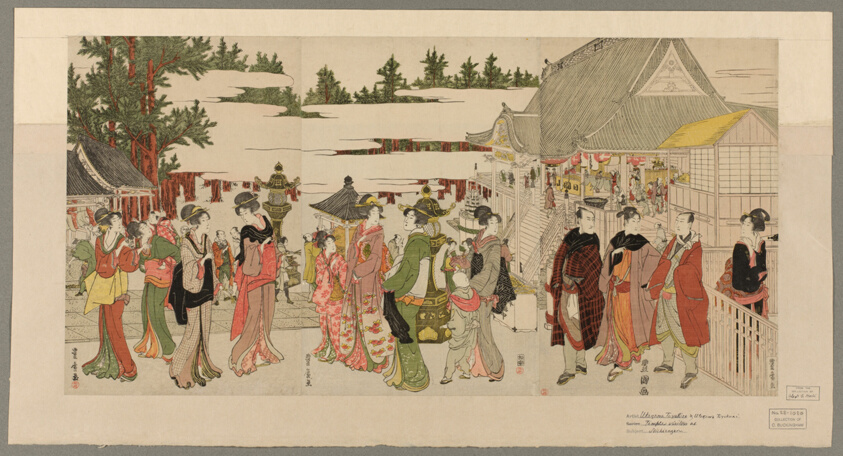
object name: Print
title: New Year's Pilgrimage to Myohoji Temple in Horinouchi (Horinouchi Myohoji eho mairi no zu)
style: Japanese (culture or style)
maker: Utagawa Toyokuni I; Japanese, 1769–1825; and; Utagawa Toyohiro; Japanese, 1773-1828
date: c. 1804/10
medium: Color woodblock print; three left sheets of oban pentaptych (center right sheet: 1925.3190)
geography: Japan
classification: woodblock print; print; asian art